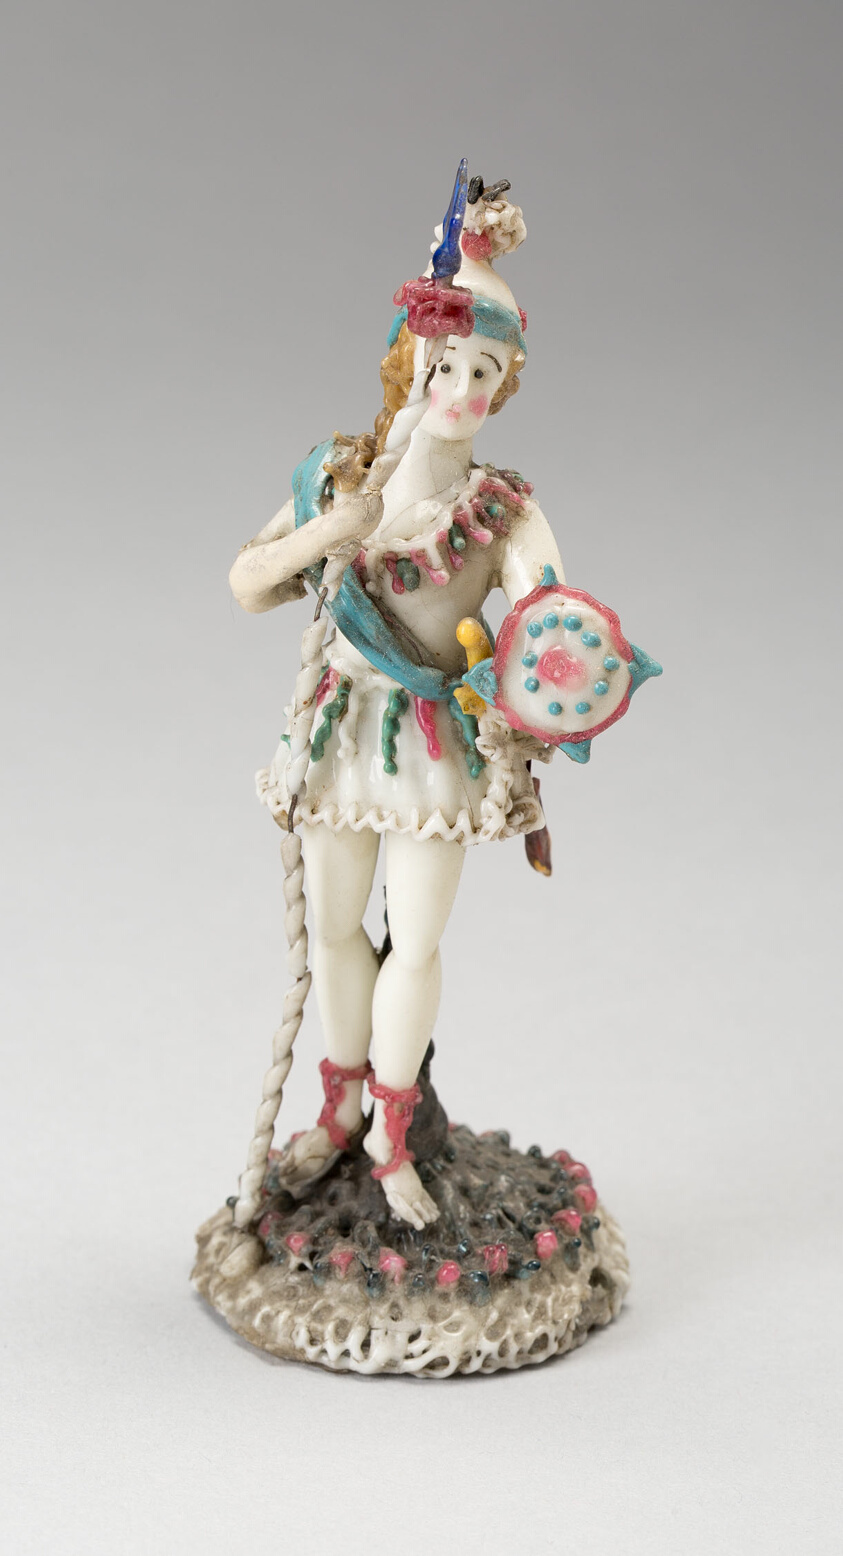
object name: Glass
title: Soldier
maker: Nevers, France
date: 1700/50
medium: Glass; lampwork (verre de Nevers), metal armature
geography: France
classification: glass; miniature; decorative object/ornament; european decorative arts